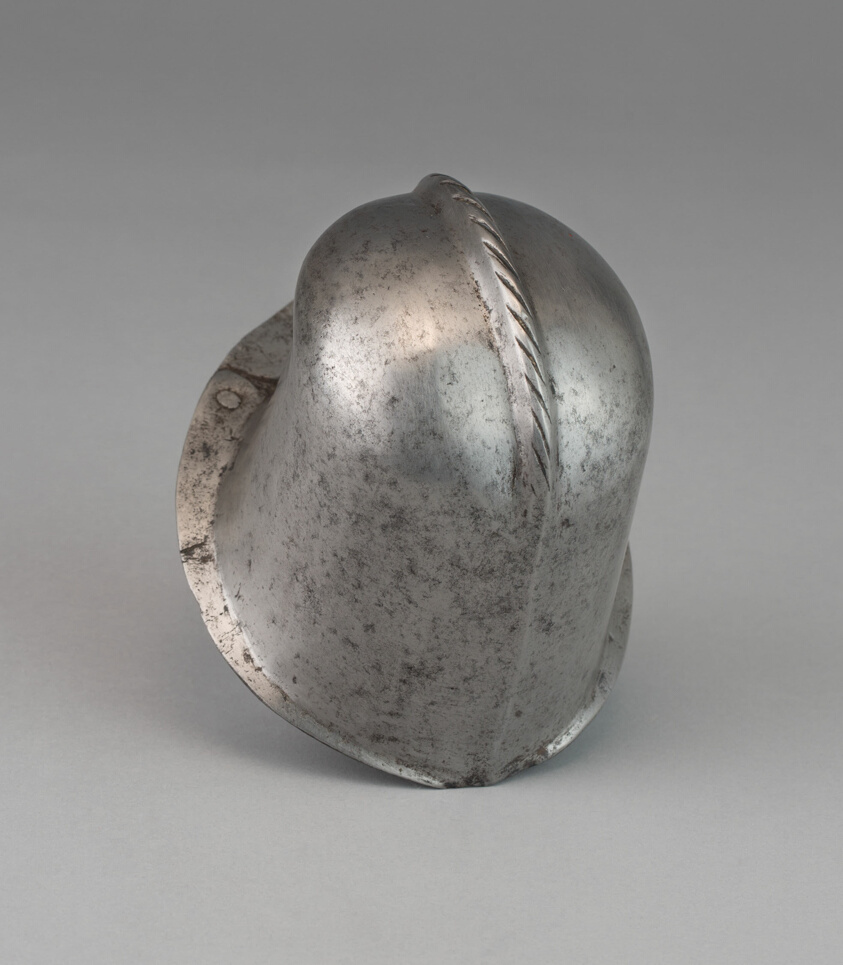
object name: Armor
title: Codpiece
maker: Southern German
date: mid–16th century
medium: Steel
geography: Germany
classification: suit-element; armor; arms and armor